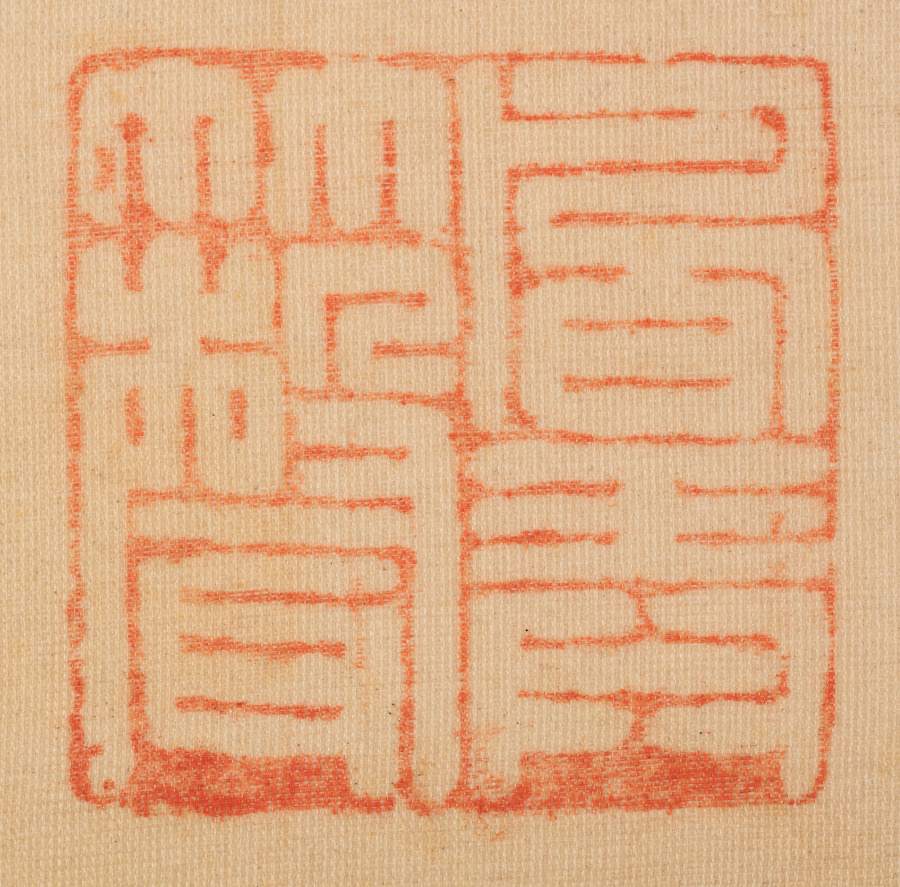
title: Orchids and Rocks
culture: Korea, Joseon dynasty (1392–1910)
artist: Yi Ha-eung (Korean, 1820–1898)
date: 1897–98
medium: Eight-panel folding screen; ink on silk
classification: Painting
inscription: Translation: [I] painted for the high minister Yangwon. [I] humbly request your corrections and advice [on my painting]. [By] an eighty-year old gentleman of rocks.)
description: Yi Ha-eung (1820−1898), the artist of this eight-panel folding screen, was one of the most influential men in late 19th-century Korea. Acting as the regent for his son, King Gojong (1852−1919), who ascended the throne at the age of thirteen, Yi ruled Korea from 1866 to 1873. In addition to his illustrious political career, Yi was also recognized as one of the most celebrated artists who led the revival of literati art in late 19th-century Korean art. In particular, he was recognized as the master of orchids, one of the “Four Gentlemen” (plum, orchid, chrysanthemum, and bamboo) themes. Solely relying on monochrome ink, Yi depicted the curvilinear silhouettes of cymbidium orchid leaves dramatically hanging down from cliffs. Growing in wilderness and redolent with fragrance, orchids were often associated with the perseverance of principled gentlemen, and thus became one of the most popular subjects of scholar-artists' paintings.On the upper right corner of the far left panel, Yi wrote a short inscription stating that he painted the work at the age of 80.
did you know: The artist of this elegant painting is the formidable politician Yi Ha-eung (1820–1898), who is known for a seclusion policy that aimed to protect Korea and its sovereignty from foreign influences.